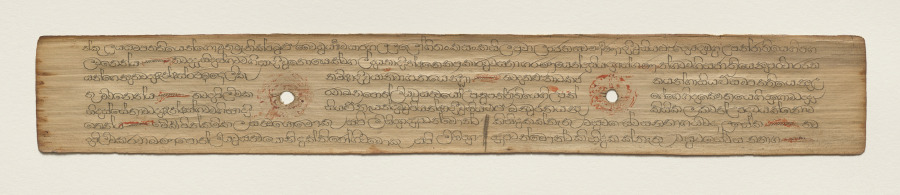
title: Leaf from a Buddhist Manuscript (verso)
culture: Sri Lanka, Singhalese, Late 17th century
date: c. 1700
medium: fiber paper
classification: Manuscript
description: Palm leaf material is still used for manuscripts in Sri Lanka. The palm leaves are prepared first by boiling them, drying them in the sun, and then rubbing them with oils. Scribes then use a metal stylus to incise the text. Then charcoal powder is wiped across the pages, filling in only the inscribed lines.